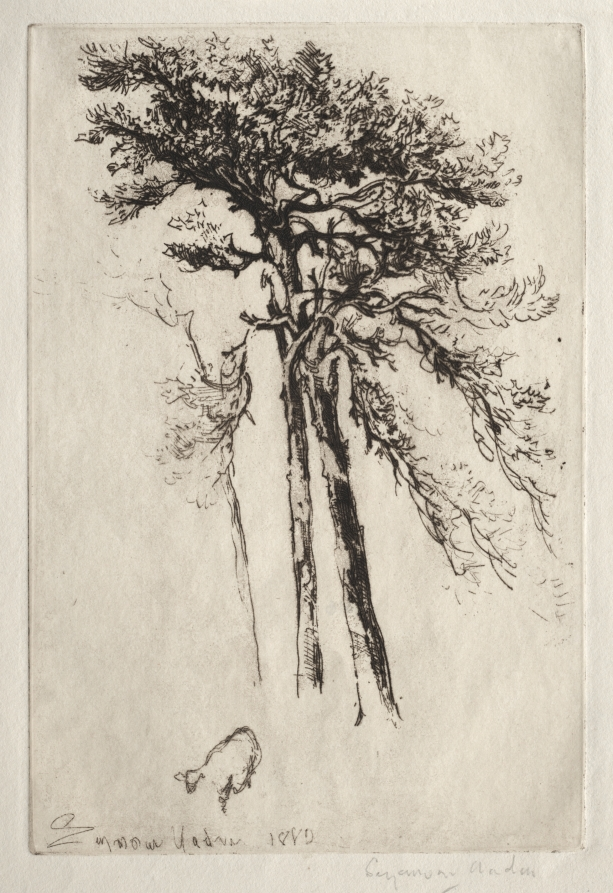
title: The Latest Tree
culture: England, 19th century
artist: Francis Seymour Haden (British, 1818–1910)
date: 1882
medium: etching and drypoint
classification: Print